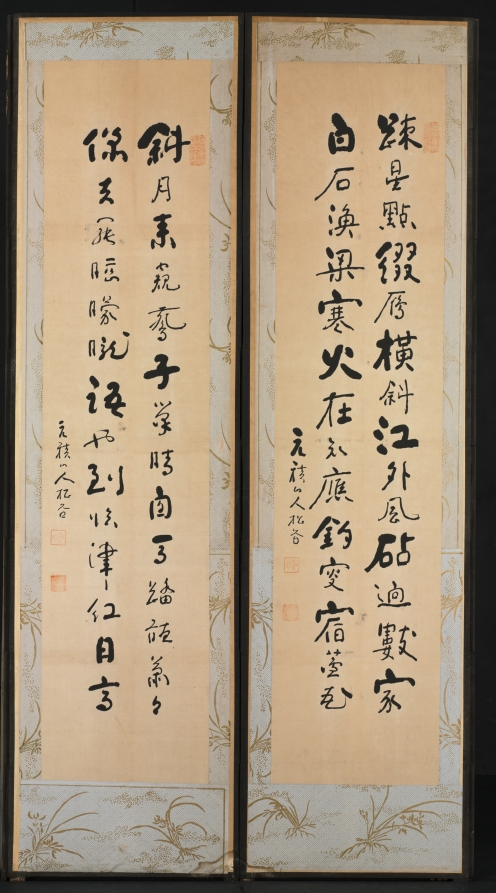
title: Painting of One Hundred Themes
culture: Korea, Joseon dynasty (1392–1910)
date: late 1800s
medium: Ten-panel folding screen affixed with album leaves (obverse), calligraphy (reverse), ink and color on silk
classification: Painting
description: The front of this screen features an assortment of subjects: birds and flowers, landscapes, and scenes of everyday life, mostly in monochromatic ink with light colors. The screen’s reverse side conveys a number of classical poems about the fleeting beauty of the four seasons. Traditionally, only one side of a folding screen bears painted or embroidered images, since these were used as a background furnishing. In Korean houses by the 1800s and early 1900s, however, two-sided folding screens became noticeably popular, possibly inspired by Japanese double-sided folding screens, which mainly served as room dividers in Japanese households.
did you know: The way of displaying small images of various subjects became one of the most popular type of painting toward the end of the 19th century.